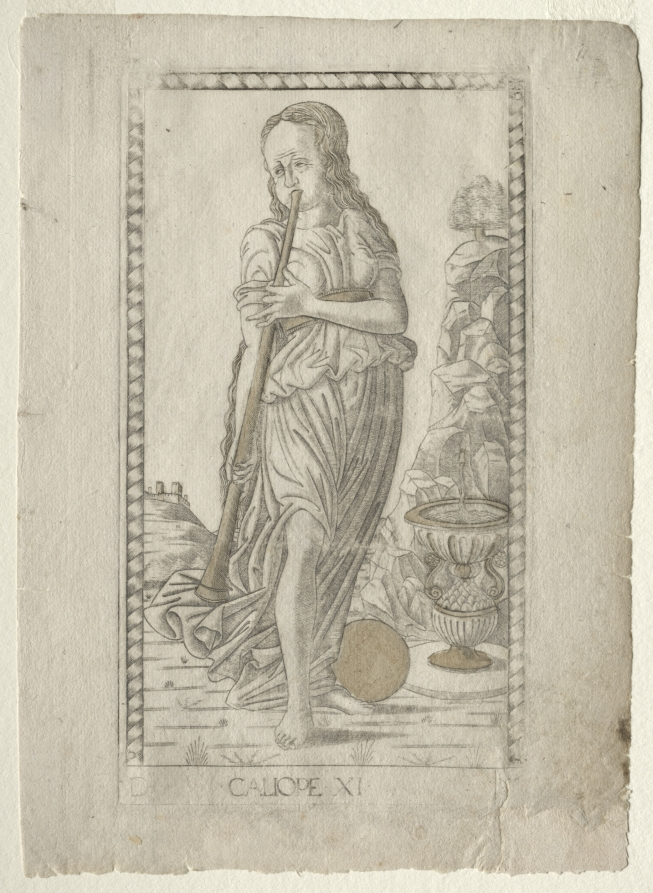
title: Calliope (from the Tarocchi series D: Apollo and the Muses, #11)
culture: Italy, Ferrara, 15th century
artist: Master of the E-Series Tarocchi (Italian, active 1460s)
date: before 1467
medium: engraving hand-colored with gold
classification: Print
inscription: Lettered below the image of Caliope (Calliope): ·D· / ·CALIOPE·XI· / [11]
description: This engraving is part of the Tarocchi group marked with the letter “D,” and named Apollo and the Muses. In Greek mythology, the nine Muses (Calliope, Urania, Terpsichore, Erato, Polyhymnia, Thalia, Melpomene, Euterpe, and Clio) were the daughters of Zeus, king of the gods, and Mnemosyne, the Titaness of memory. The Muses were goddesses presiding over different branches of the arts and sciences. Their leader and supervisor was Apollo, the god of light, music, prophecy, and poetry. Here, Caliope (Calliope) is personified as a full-length female figure, playing a long horn. Next to her is a fountain. This symbolizes the Greek Castalian font at Mount Parnassus, sacred to the Muses and believed by poets to be a source of inspiration. Calliope was regarded as the foremost of the Muses and the one prompting epic poetry.